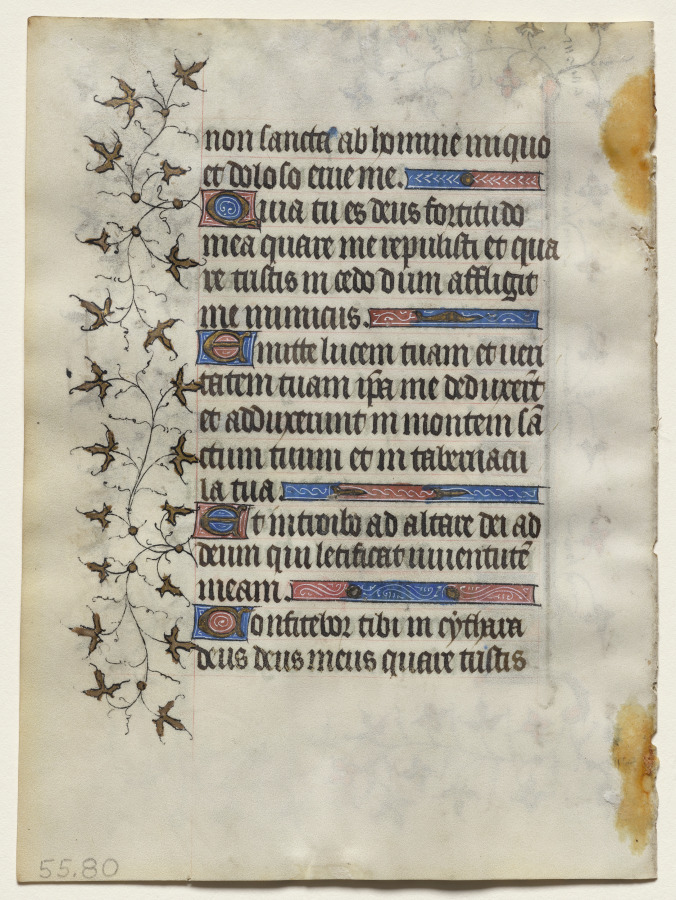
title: Bifolio from a Book of Hours: Coronation of the Virgin (recto)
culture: France, Paris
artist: workshop of Boucicaut Master (French, Paris, active about 1410–25)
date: c. 1415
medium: ink, tempera, and gold on vellum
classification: Manuscript